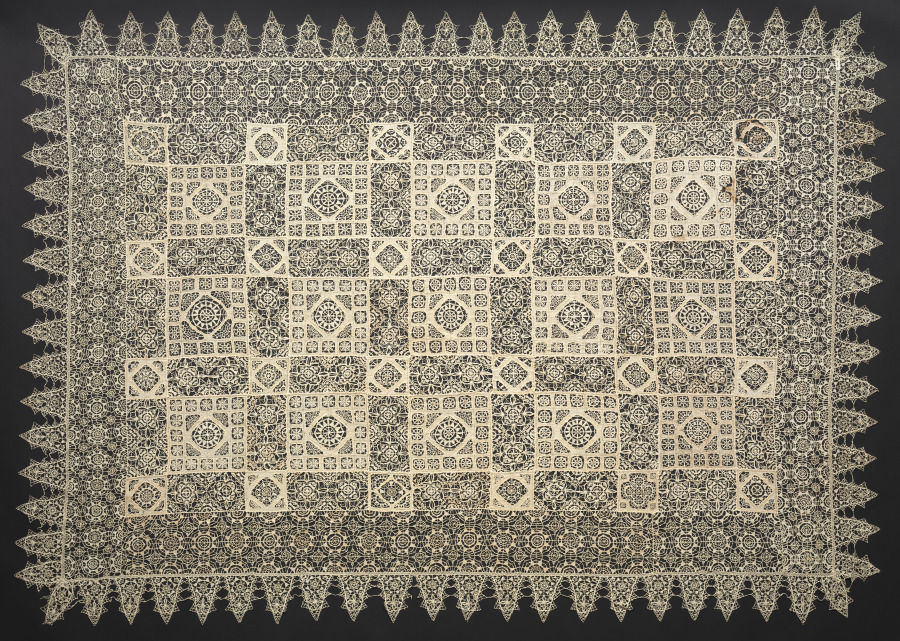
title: Lace Cloth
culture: Italy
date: 1560–1600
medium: Linen; needle lace (cutwork and reticella)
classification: Lace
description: Consisting of more than 80 squares of cutwork (a cut and embellished linen ground) and rectangles of reticella (needle lace), this luxurious cover could have been made by a single person or several people who divided the work. Close looking reveals that the cloth is made with threads of two very slightly different colors: bleached and unbleached linen. Together the sections resemble snowflakes, which are of similar shape and size but vary subtly from one another. The perplexing dark stitches in the upper left corner do not repair damage, and might be the maker’s signature.